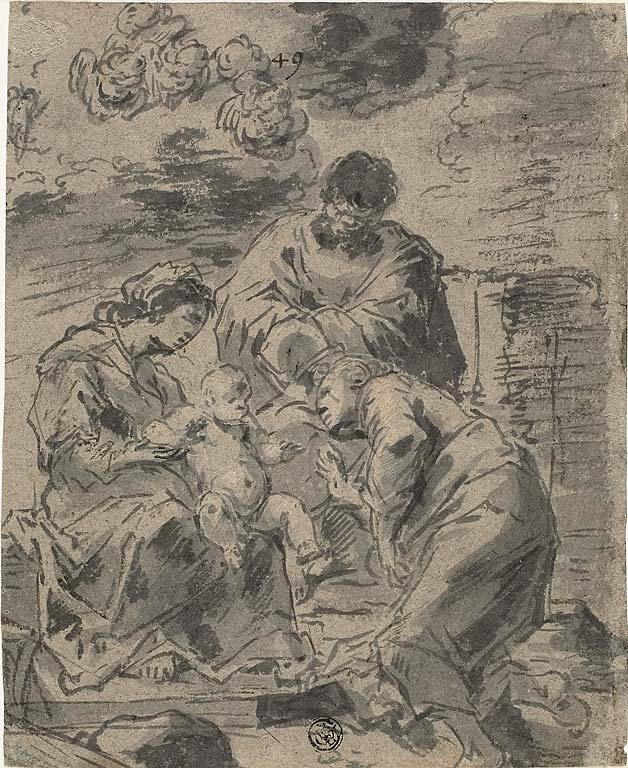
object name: Drawing and Watercolor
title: The Mystic Marriage of Saint Catherine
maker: Leonard Bramer (Dutch, 1596-1674)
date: 1660/69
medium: Pen and gray ink with brush and gray wash, heightened with lead white (partly discolored), on gray laid paper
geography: Netherlands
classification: ink or chalk wash; drawings (visual works); prints and drawing